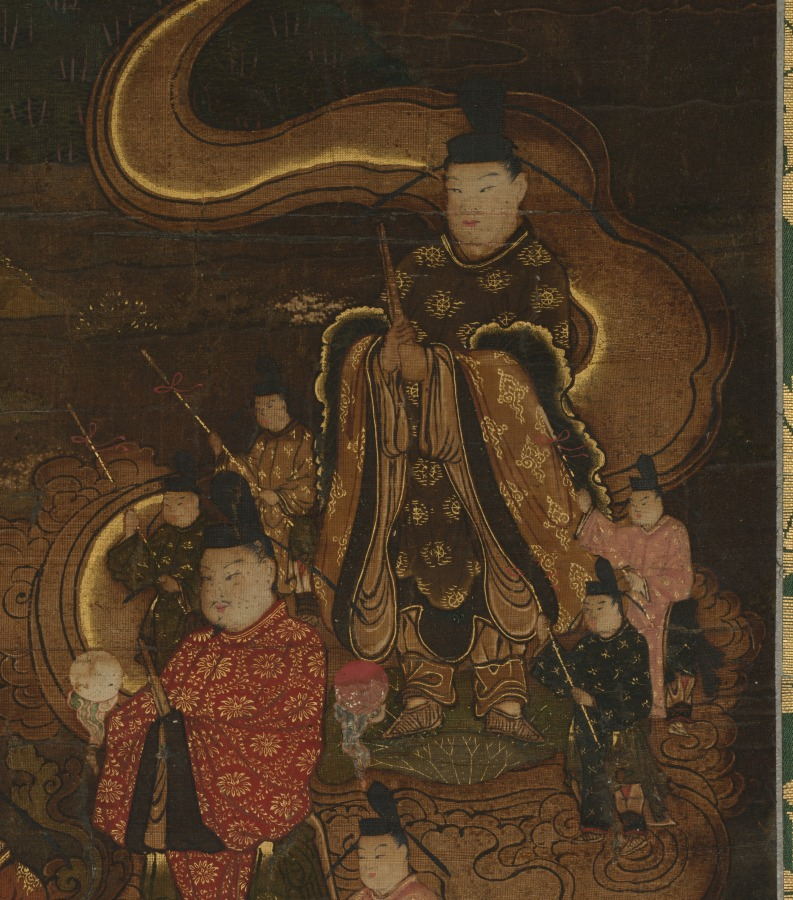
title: Descent of the Nine Luminaries and the Seven Stars at Kasuga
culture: Japan, Nanbokuchō period (1336–92)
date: mid- to late 1300s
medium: Hanging scroll; ink, color, gold and cut gold on silk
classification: Painting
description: This medieval religious painting shows celestial beings descending from the heavens into the Kasuga Shrine, a major religious site in Japan's ancient capital, Nara. The moon and the Kasuga mountain range appear in the uppermost portion of the painting, as does a red shrine entrance gate, or torii. In the upper part of the painting, figural representations of the stars in the constellation known as the Big Dipper in the West descend from right to left on cloud banks. In the lower part, the Nine Luminaries (Sanskrit: Navagraha) that emerged from the Vedic tradition—the sun and moon; the planets Jupiter, Mars, Saturn, Venus, and Mercury; and personifications of the fluctuating lunar nodes—descend in similar fashion. The painting uses the "deities in descent" scheme originating in China, as well as the original Buddhist form mandala (Japanese: honjibutsu mandarazu) format prevalent in medieval Japanese Shinto-Buddhist painting, to generate an image connected to the worship of celestial bodies in Esoteric Buddhism.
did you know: A 19th-century copy of this painting in ink and light color exists at the Kyoto City University of Arts.